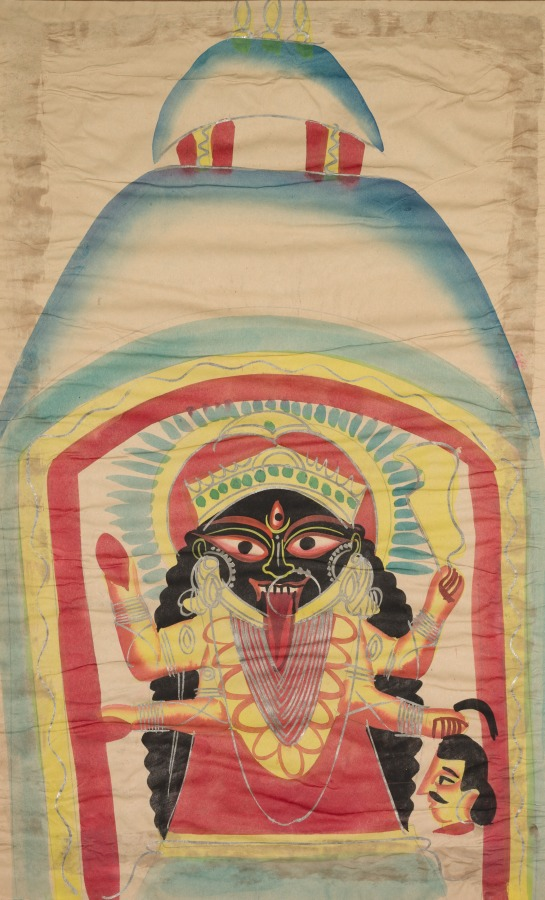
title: Kali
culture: Eastern India, Bengal, Kolkata, Kalighat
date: c. 1890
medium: Gum tempera, graphite, ink, and tin on paper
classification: Painting